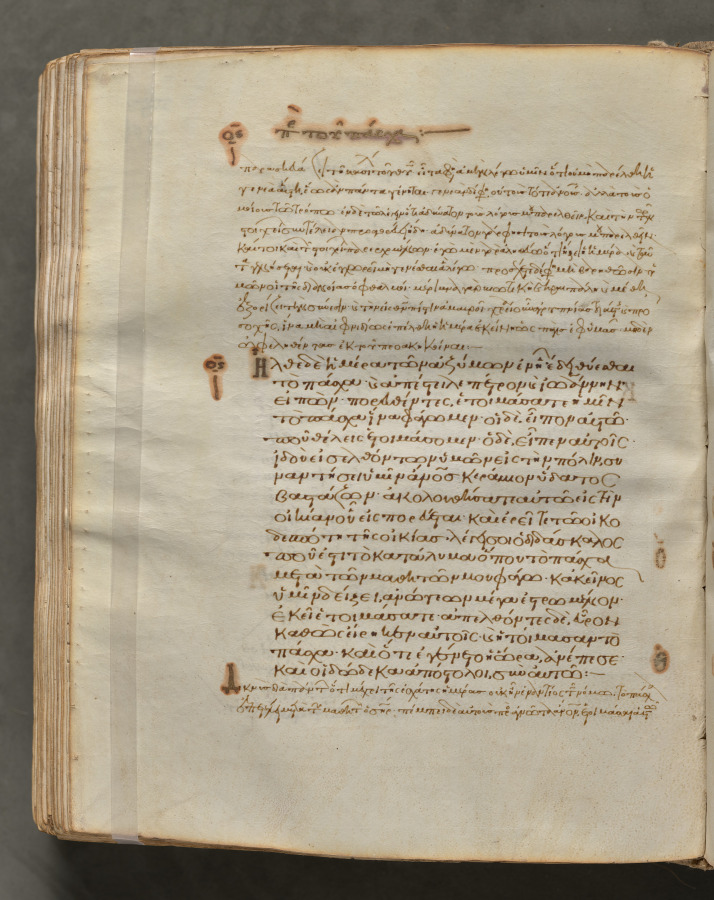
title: Text, folio 306 (verso), from a Gospel Book with Commentaries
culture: Byzantium, Constantinople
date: c. 1000–1100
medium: ink, tempera, and gold on vellum; leather binding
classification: Bound Volume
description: Each of the four gospels in this book opens on a page with brilliantly illuminated borders depicting the author of the text as well as birds—principally peacocks, symbols of the immortality of the soul—and fountains, representing the fountain of life and the salvation of the soul. This volume consists of 428 leaves with texts in Greek. Its level of sophistication suggests that it was probably written and decorated in a monastery in Constantinople.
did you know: Gospel books were carried in procession through Byzantine churches.